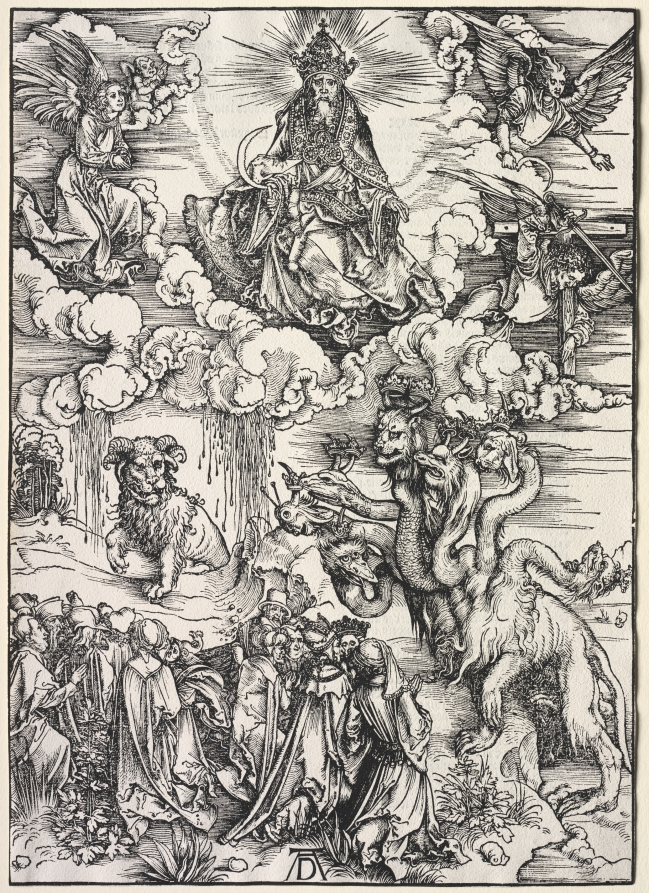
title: Revelation of St. John: Beast with Ram's Horns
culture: Germany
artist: Albrecht Dürer (German, 1471–1528)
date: 1511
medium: woodcut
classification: Print